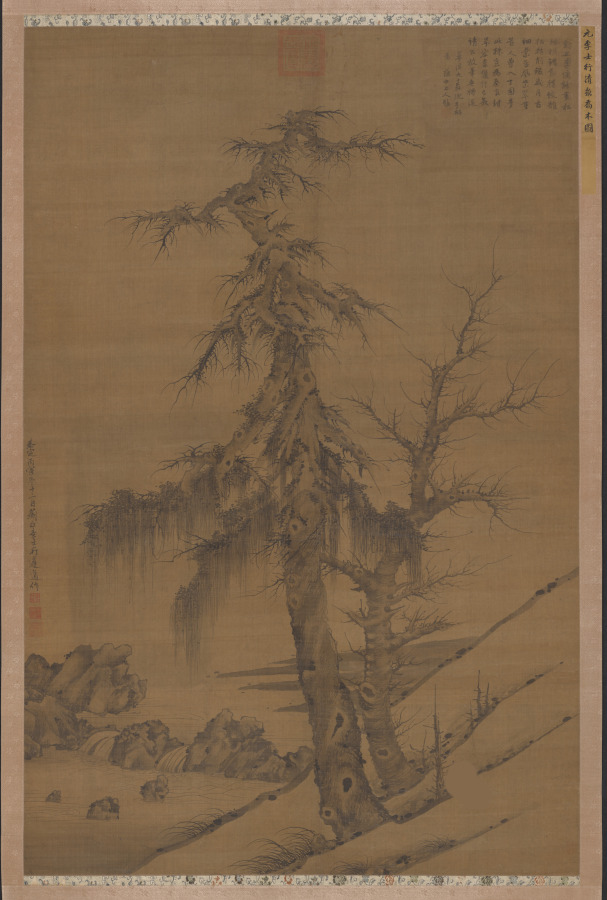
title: Old Trees by a Cool Spring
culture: China, Yuan dynasty (1271-1368)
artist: Li Shixing (Chinese, 1283–1328)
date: 1326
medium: hanging scroll; ink on silk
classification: Painting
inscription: 泰定丙寅年冬十二月薊丘李士行遵道作。[印] 李士行印; 李氏遵道; 遊戲翰墨.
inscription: 薊丘李侯能畫松，蟠根錯節騰蛟龍。 枯梢削鐵歲月古，細葉當風紫翠重。 昔人曾入子固夢，此株豈為秦官封。 畢宏韋偃偕已矣，請公放筆吾將從。 華溪九十翁沈夢麟書 蘊中上人題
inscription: [印] 明善堂所見書畫印記; [印] 怡親王寶